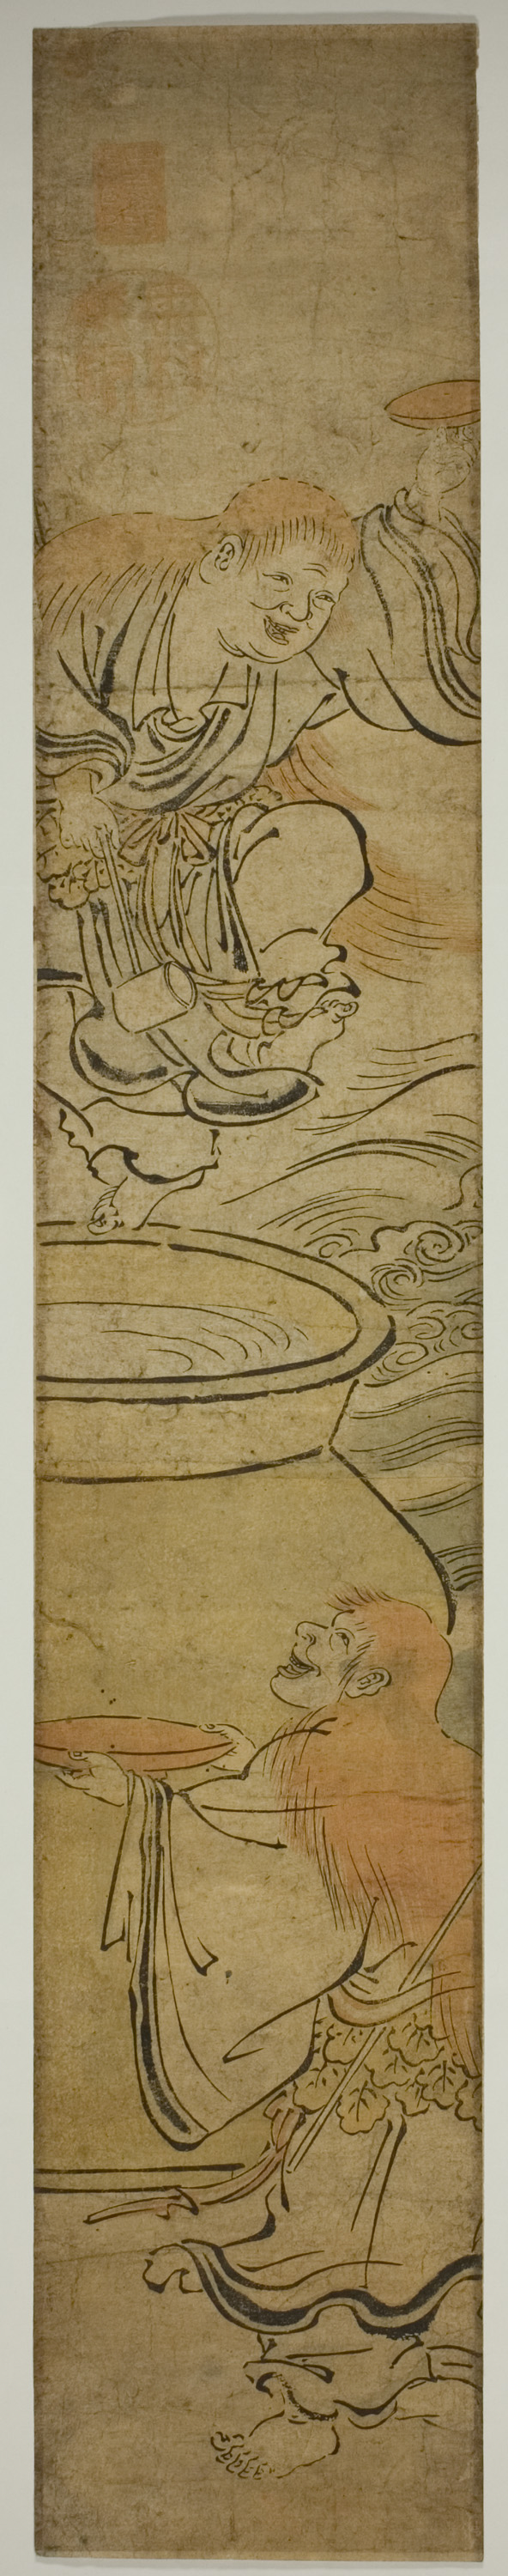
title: Drunken Goblins (Shôjô)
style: edo (japanese period), Japanism, East Asian, asian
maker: Okumura Masanobu (Japanese, 1686-1764)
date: 18th century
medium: Woodblock print (beni-e), ink and colors on paper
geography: Japan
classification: woodblock print; print; asian art